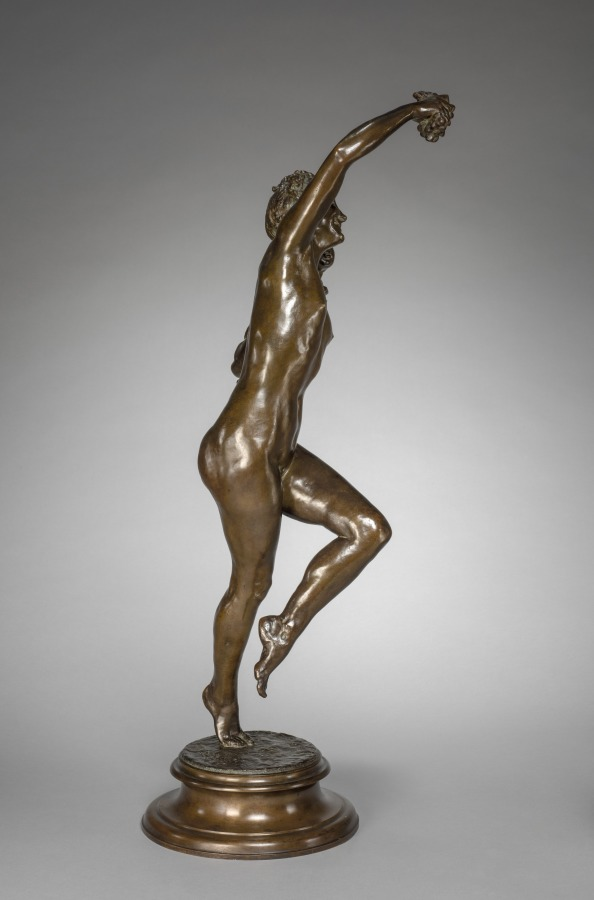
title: Bacchante and Infant Faun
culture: America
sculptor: Frederick William MacMonnies (American, 1863–1937)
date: 1894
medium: bronze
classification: Sculpture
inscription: Signed on base: F. Macmonnies, 1894.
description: This sculpture is a smaller version of a three-quarter life-size bronze given by the artist to Charles McKim, the architect for the Boston Public Library who placed the statue in the fountain of the library's courtyard. Although the vast majority of Bostonians supported the statue, a small but powerful group denounced it as "debauched," "vice-ridden," and "treason to purity and sobriety and virtue, and Almighty God." The opponents included the Boston Brahmins—a group of Anglo-Saxon, Protestant elite—and various religious, temperance, and antivice organizations. Feeling threatened by the swell of immigrants and by the changing roles of women, these groups hoped that the library would offer an alternative to the saloons frequented by Boston's lower classes. But a statue of a nude woman reveling under the effects of wine from the Roman god Bacchus only devalued this bastion of civilization. Consequently, the Boston Art Commission rejected the statue in 1897. However, in 1992 Boston's Art and Humanities commissioner and the library trustees returned a version of the original to the courtyard without public protest.